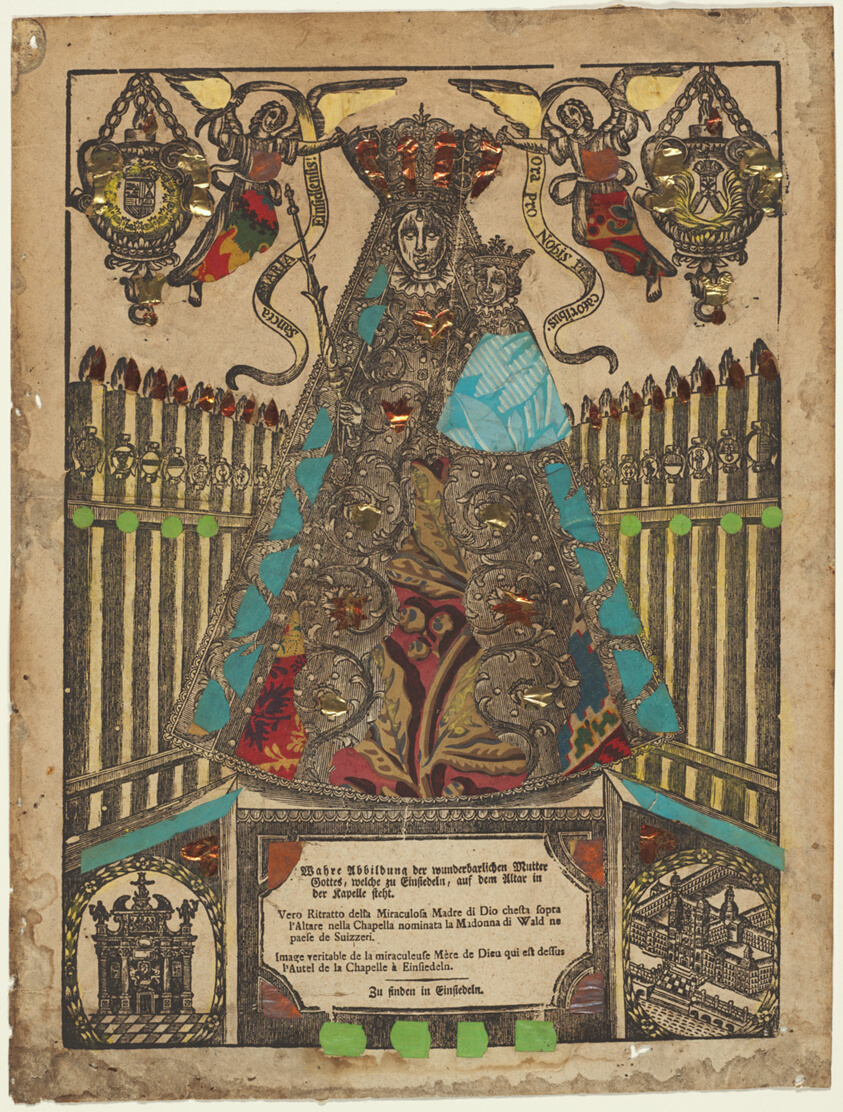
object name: Print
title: The Adoration of the Einsiedeln Madonna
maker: Artist unknown; German or Swiss, 18th century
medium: Woodcut in black hand colored with elements of fabric, copper alloy metal foil, and block printed distemper colorants on paper, attached to the verso and visible through cutouts, on ivory laid paper (discolored to buff), laid down on blue wove paper (discolored to tan)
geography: Germany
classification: engraving; print; prints and drawing